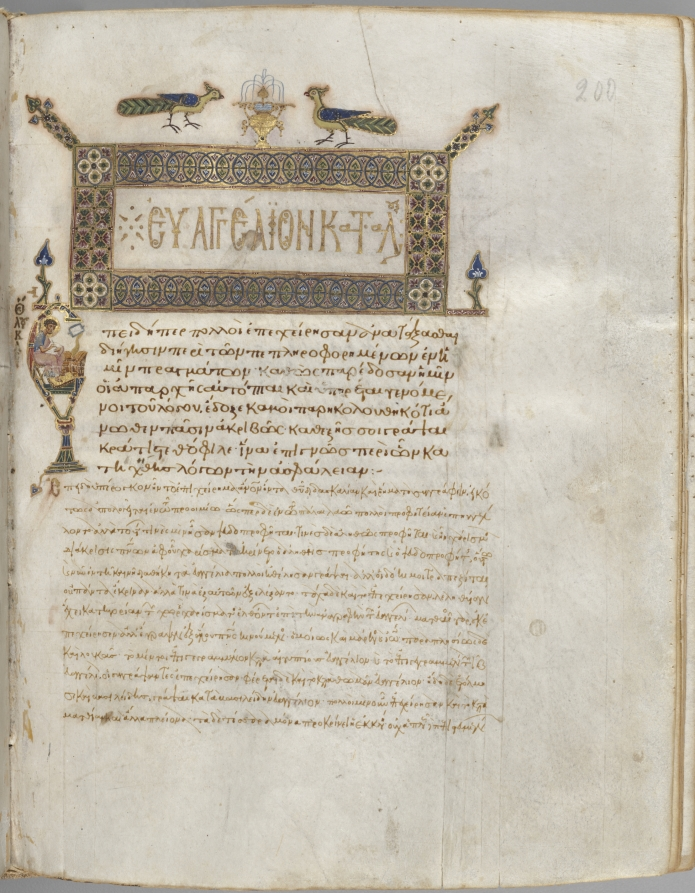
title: Portrait of Luke, folio 200 (recto), from a Gospel Book with Commentaries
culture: Byzantium, Constantinople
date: c. 1000–1100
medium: ink, tempera, and gold on vellum; leather binding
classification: Bound Volume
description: Each of the four gospels in this book opens on a page with brilliantly illuminated borders depicting the author of the text as well as birds-principally peacocks, symbols of the immortality of the soul-and fountains, representing the fountain of life and the salvation of the soul. This volume consists of 428 leaves with texts in Greek. Its level of sophistication suggests that it was probably written and decorated in a monastery in Constantinople.